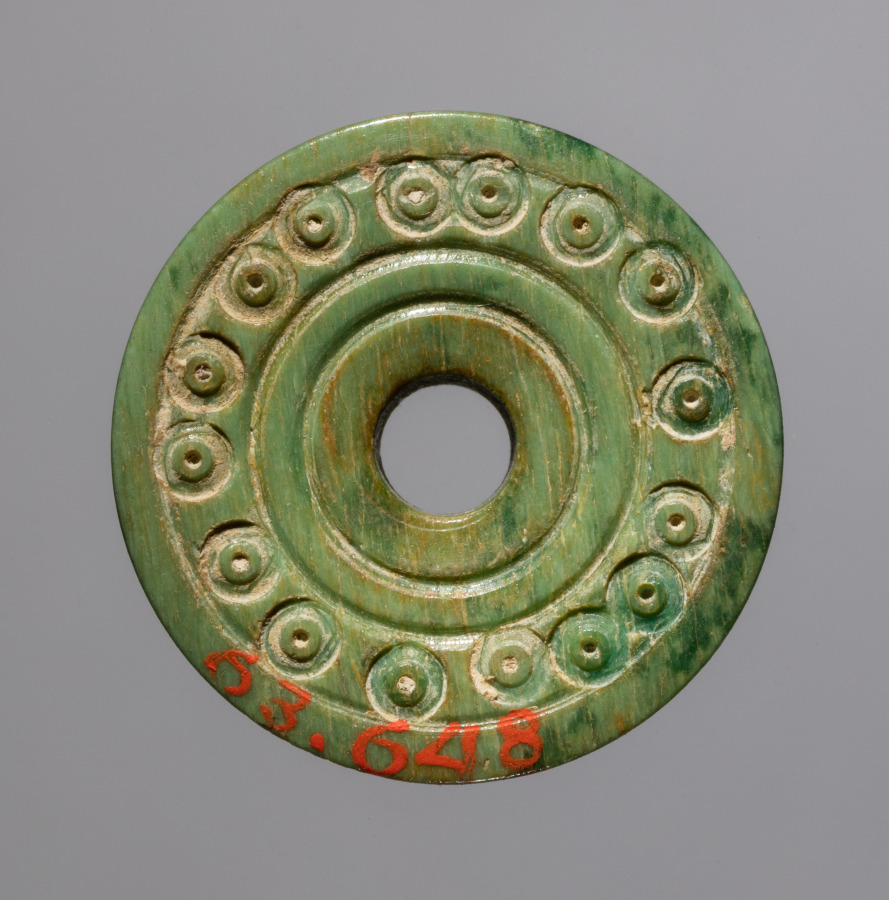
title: Spindle Whorl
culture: Iran, early Islamic period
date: 700s - 900s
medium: bone, incised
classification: Spindle Whorl